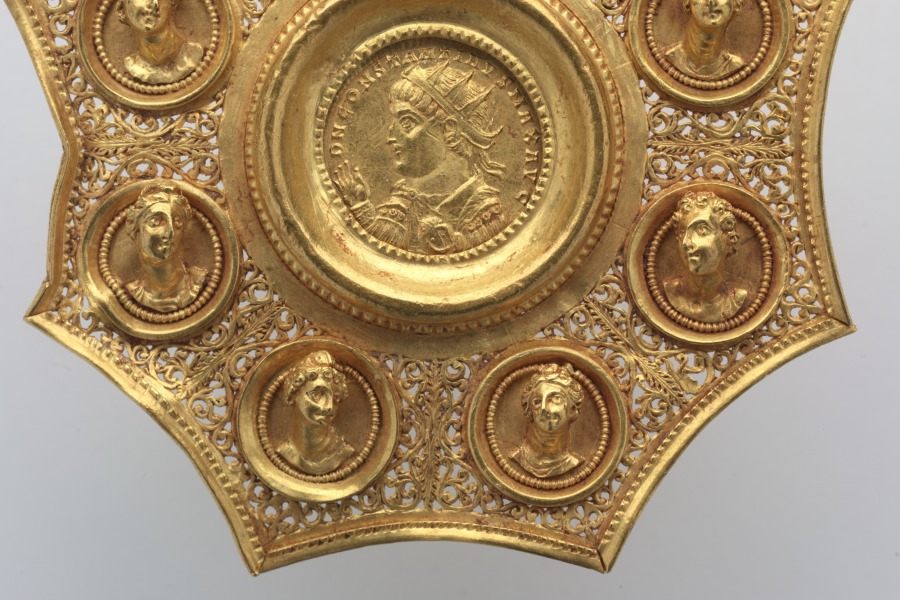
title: Octagonal Pendant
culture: Byzantium, Late Roman, Eastern Mediterranean, (probably Sirium or Nicomedia), Byzantine period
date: 324–26 CE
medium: gold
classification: Jewelry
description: Mounted at the center of this octagonal pendant is a rare coin issued by Constantine the Great, the Roman Empire’s first Christian emperor. Constantine’s portrait appears on the coin’s front, those of two of his sons on the back. Constantine’s image is surrounded by male and female busts, some of which are mythological figures. The pendant once formed the centerpiece of a sumptuous gold necklace, likely a gift for a high-ranking court official or member of the imperial family.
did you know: Precious Byzantine coins, such as the one in this pendant, were mounted as jewelry and bestowed upon court officials as a special honor. They signified loyalty to the emperor and were often passed down as family heirlooms. Does your family have special objects that have been preserved from generation to generation?